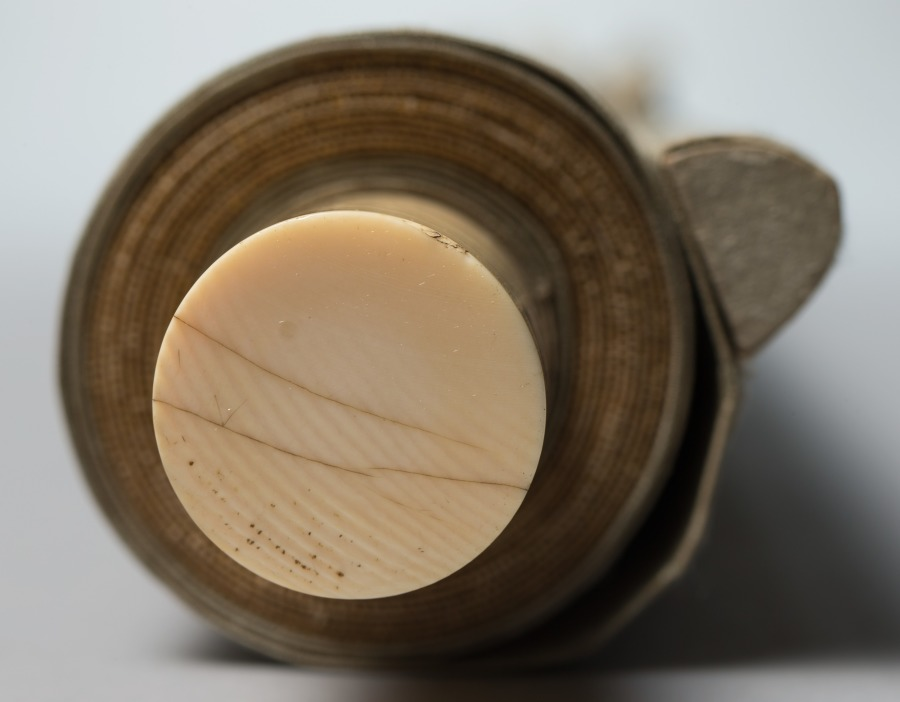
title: White-Robed Guanyin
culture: China, Southern Song dynasty (1127-1279)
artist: attributed to Zhang Yuehu (Chinese, active 1200s)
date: late 1200s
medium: Hanging scroll; ink on paper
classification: Painting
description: The figure here sits on a rocky elevation representing Potalaka in the Southern Sea, Avalokitesvara’s island home. A vase with a bamboo sprig holds pure water, the nectar of life. Bamboo shines through the figure’s halo, a way of seeing the illusionary world through the Buddhist truth. Avalokitesvara (Guanyin in Chinese), the bodhisattva of compassion, was integrated into the Chan Buddhist canon of venerated beings. In this context, the bodhisattva is often depicted in its female manifestation as the White-Robed Guanyin. The worship of the feminine White-Robed Guanyin has its origins on Mount Tianzhu in Hangzhou, where Qian Liu (852–932), ruler of the Wuyue kingdom, established the Upper Tianzhu Monastery to venerate her image.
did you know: As an artist, Zhang Yuehu was better known in Japan than in his own country.